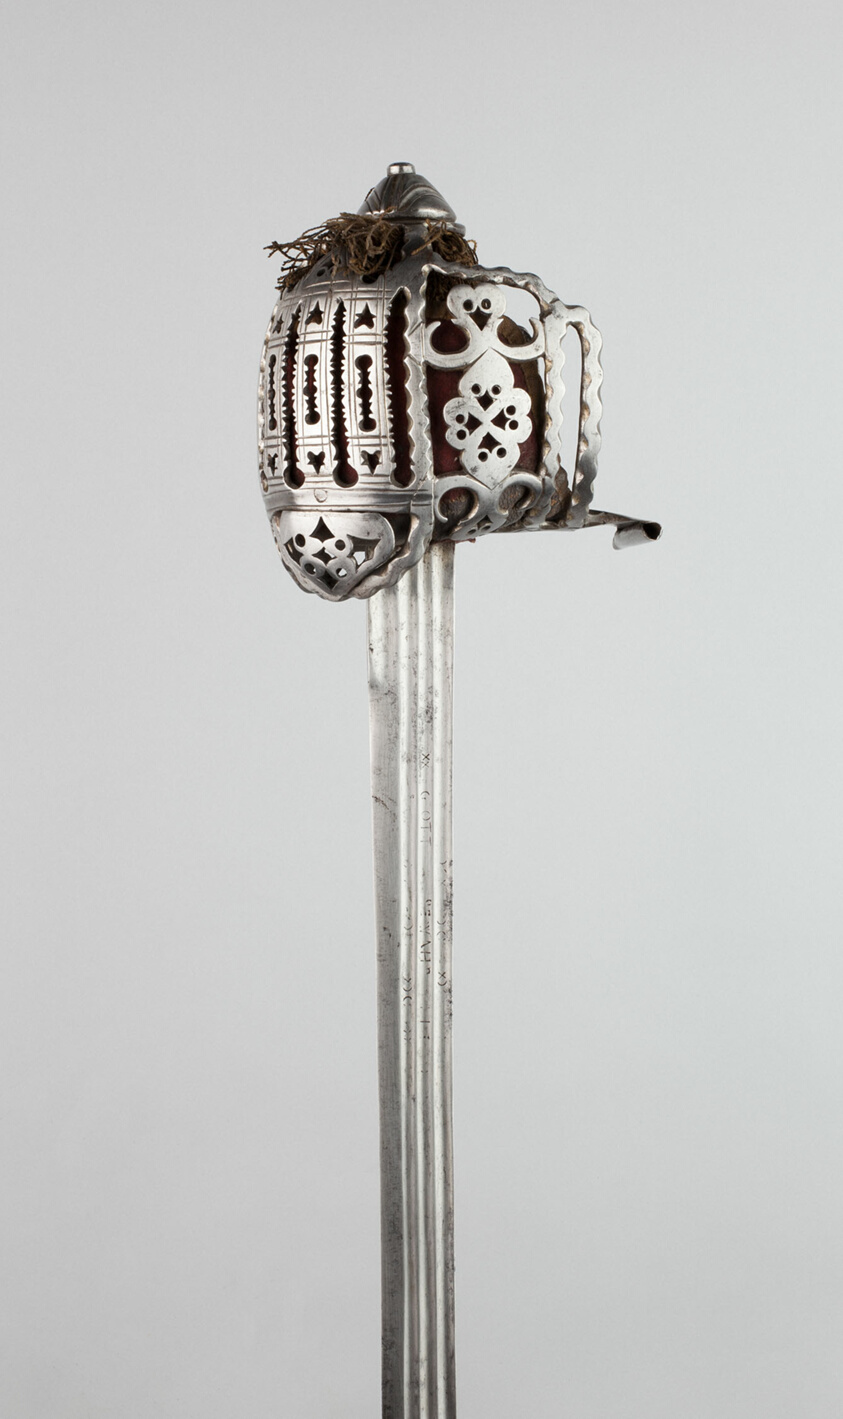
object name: Arms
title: Basket-Hilted Broadsword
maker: Scottish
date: c. 1780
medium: Steel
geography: Scotland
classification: edged weapon-sword; arms; arms and armor